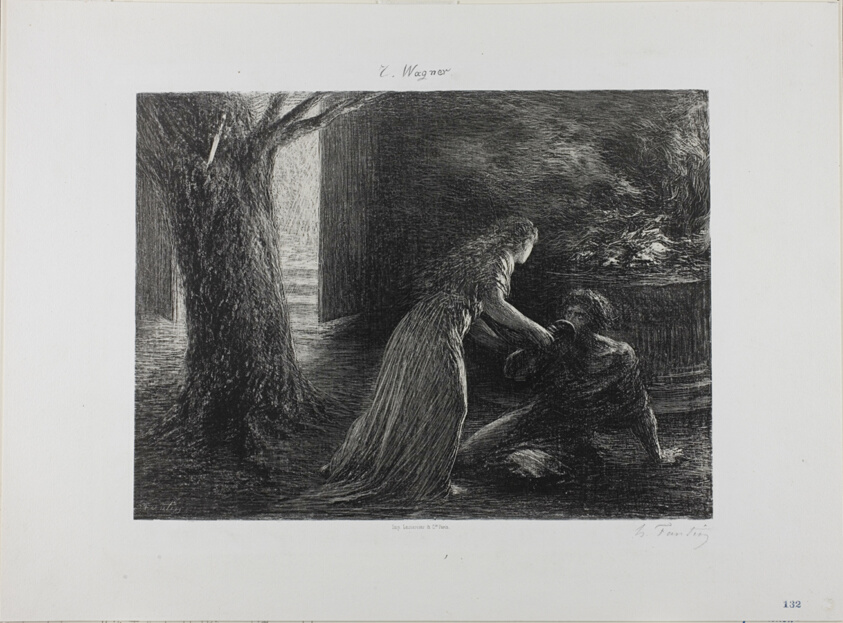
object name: Print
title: Debut of the Valkyrie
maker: Henri Fantin-Latour (French, 1836-1904)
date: 1879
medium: Lithograph in black with scraping on stone on thick ivory wove paper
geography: France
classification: lithograph; print; prints and drawing